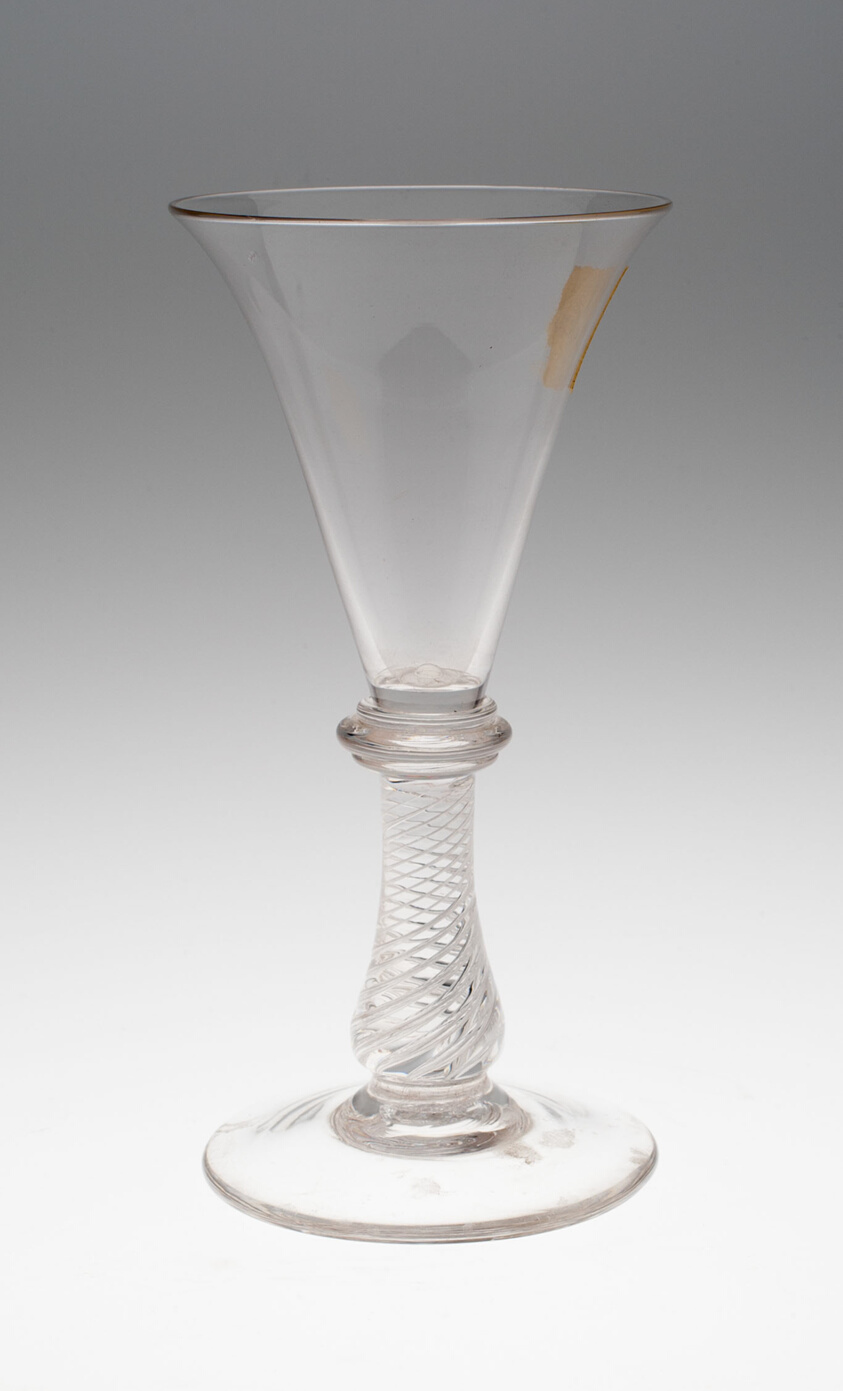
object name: Glass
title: Wine Glass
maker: England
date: c. 1750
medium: Glass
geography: England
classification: drinking vessel; glass; european decorative arts